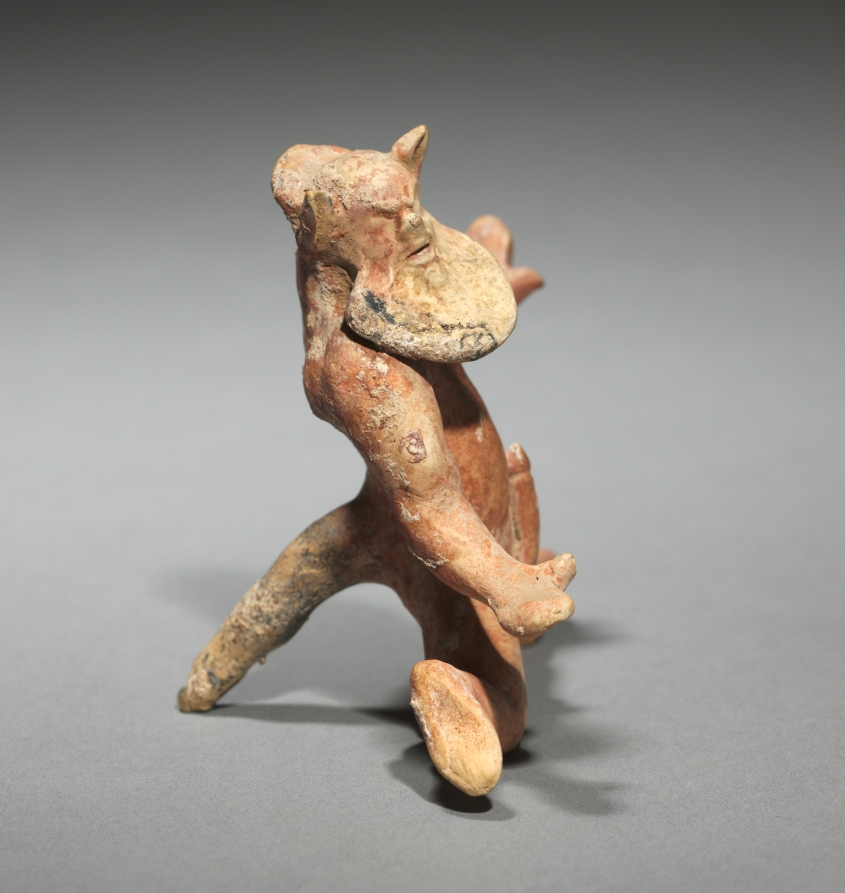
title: Dancing Satyr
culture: Greece, Boeotia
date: 500–475 BCE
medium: painted terracotta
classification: Sculpture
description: Part man and part beast, satyrs were mythical woodland creatures. In art, they were depicted with the ears and tail of a goat or horse, sometimes with hooves, and in a high state of sexual arousal. Satyrs often accompanied Dionysus, the god of wine, in his drinking bouts and other escapades. These three probably once decorated the rim of a large punch-bowl-shaped vessel for serving wine.